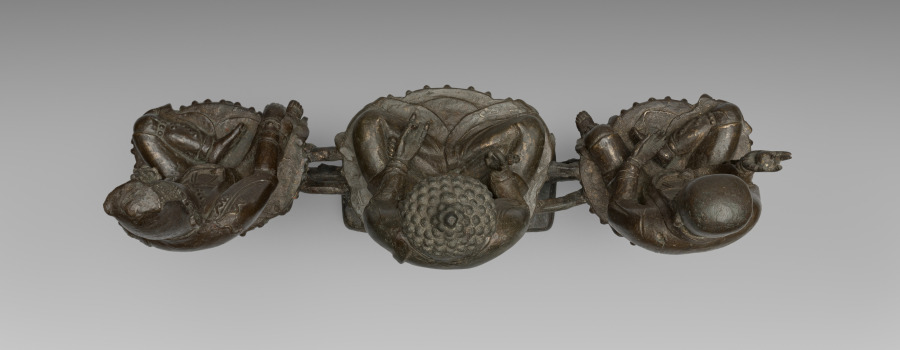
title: Amitabha Triad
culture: Korea, Joseon dynasty (1392–1910)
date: 1400s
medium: bronze with traces of gilding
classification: Sculpture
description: This bronze triad depicts Amitabha, the Buddha of Western Paradise, at the center, flanked by two bodhisattvas: Ksitigarbha on his left and Avalokiteśvara on his right. Ksitigarbha is believed to rescue those tormented beings from purgatory, while Avalokiteśvara offers relief to those suffering in the mortal realm. An exceptionally rare statue from the 1400s, this piece entered the CMA’s collection in 1918. It was discovered in Korea in 1916 by Langdon Warner (1881–1955), who was serving as the CMA’s field agent. In a letter dated December 4, 1916, Warner expressed not only his excitement upon finding the triad in a local pawn shop but also his satisfaction at purchasing it at a significantly reduced price.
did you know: The small scale suggests that this rare bronze triad might have been displayed in a personal shrine rather than a large worship hall.